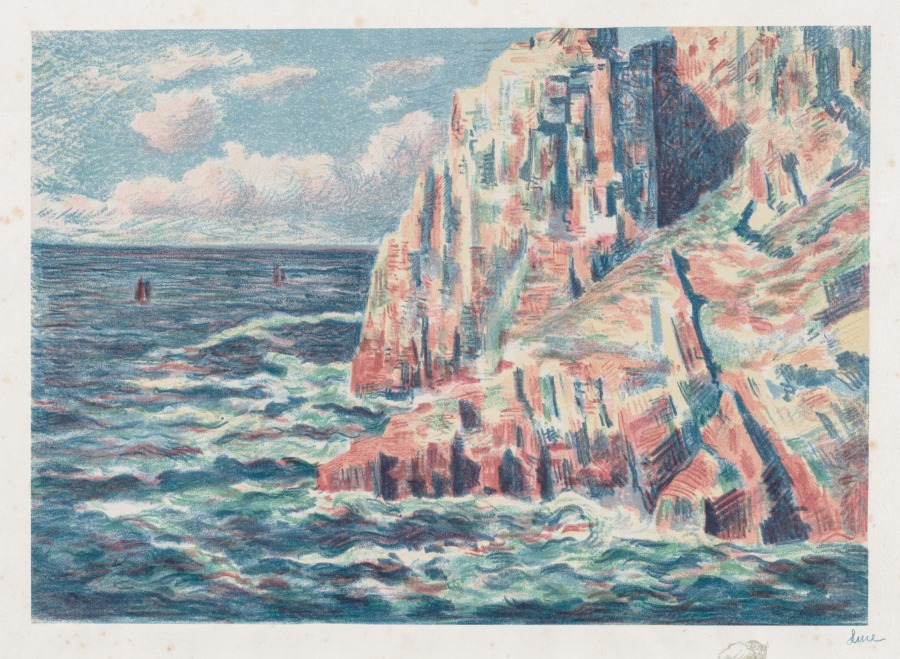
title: The Sea at Camaret, The Red Rocks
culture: France, 19th-20th century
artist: Maximilien Luce (French, 1858–1941)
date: 1895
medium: lithograph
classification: Print